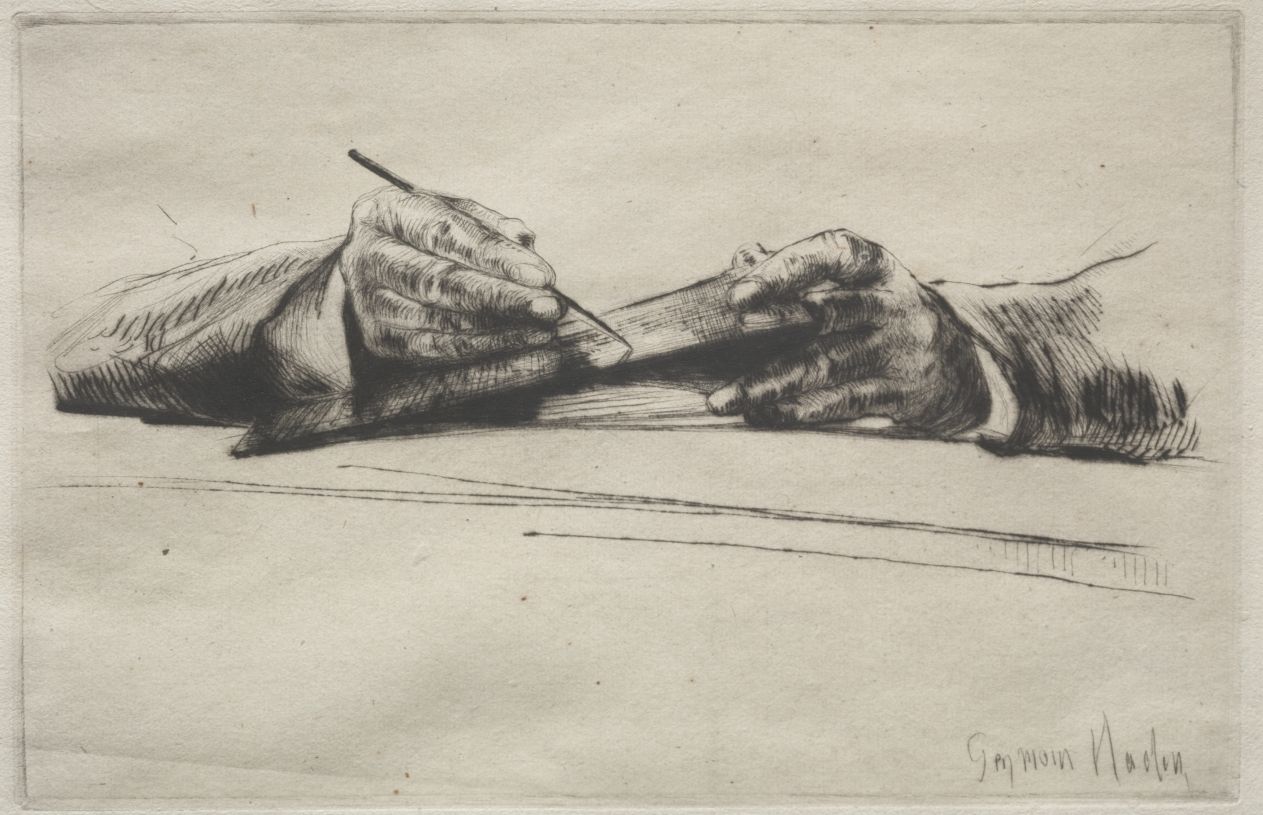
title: Hands Drypointing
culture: England, 19th century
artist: Francis Seymour Haden (British, 1818–1910)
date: 1865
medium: drypoint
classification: Print